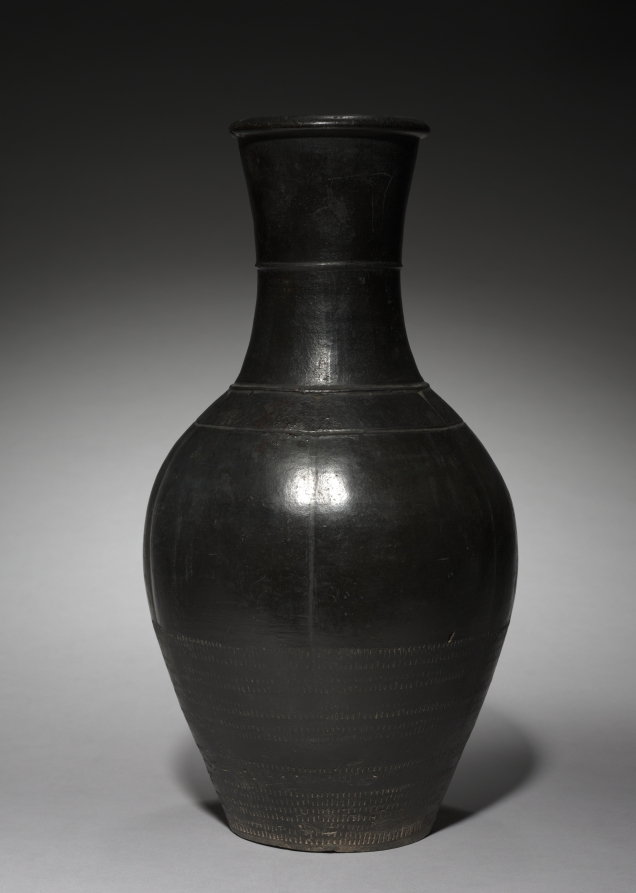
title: Vase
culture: Northeast China, Liao dynasty (916-1125)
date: 916–1125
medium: burnished stoneware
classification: Ceramic